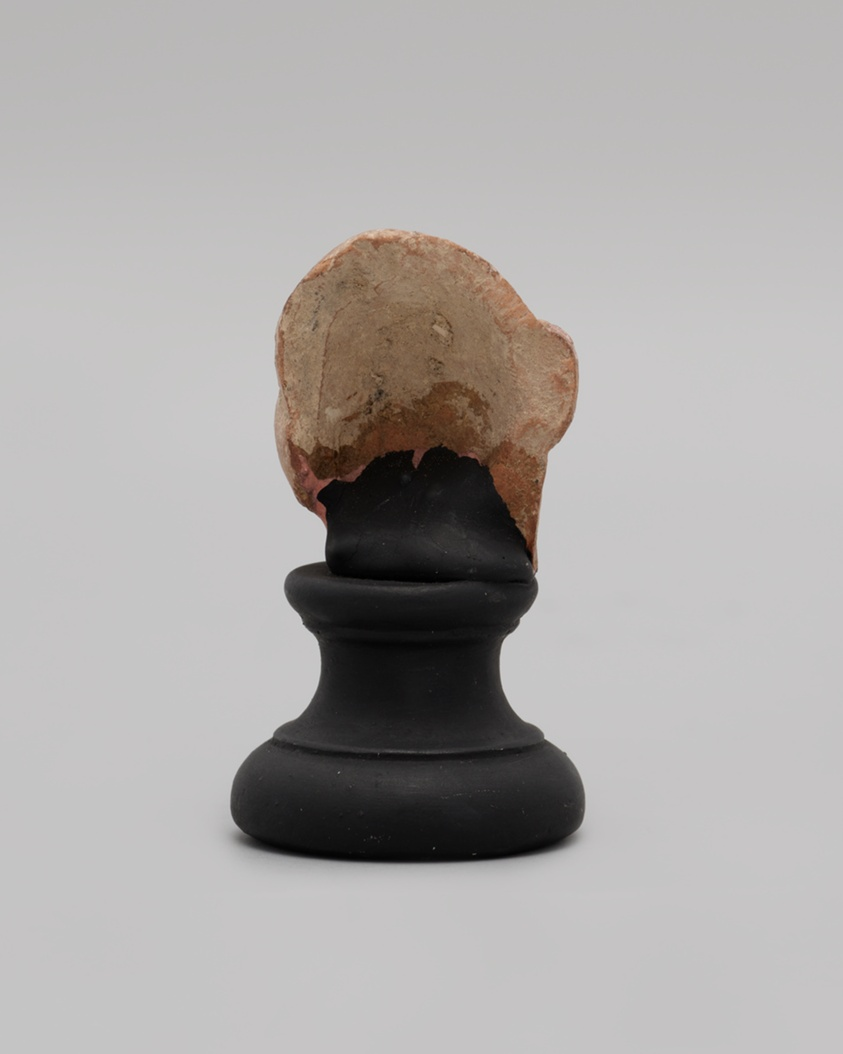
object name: Sculpture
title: Head of a Man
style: greek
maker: Greek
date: 2nd-1st century BCE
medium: terracotta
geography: Greece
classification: earthenware; ceramics; sculpture; ancient art